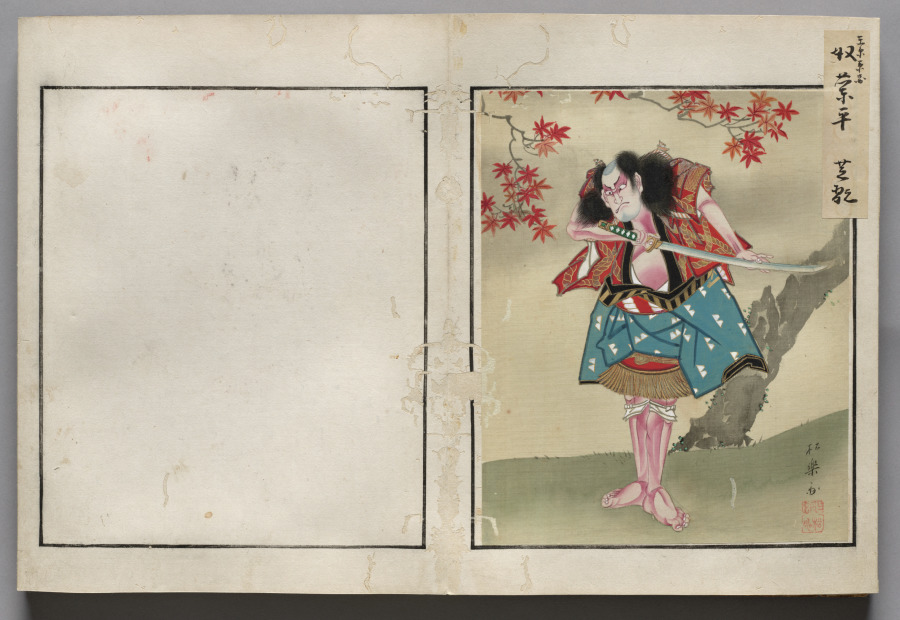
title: Double-Leaf from Album of Actor Portraits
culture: Japan, Edo period (1615–1868)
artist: Shōrakusai (Japanese)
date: c. 1790–1810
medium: double-leaf from an accordion-style album; ink and color on silk (right)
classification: Painting